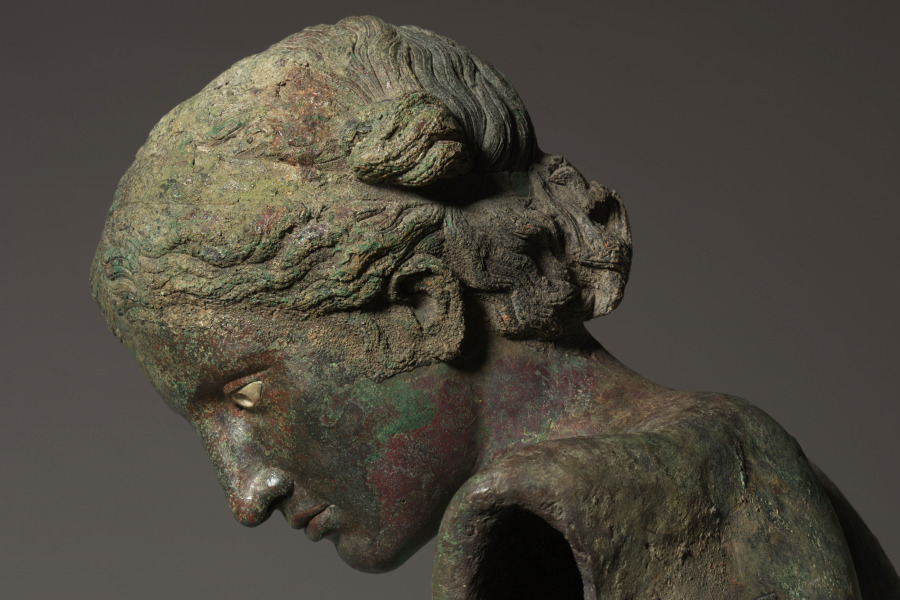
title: The Cleveland Apollo: Apollo Sauroktonos (Lizard-Slayer) or Apollo the Python-Slayer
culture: Greece, Athens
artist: attributed to Praxiteles (Greek, Athenian, c. 400–330 BCE)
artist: or Follower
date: c. 350–200 BCE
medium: bronze, copper and stone inlay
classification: Sculpture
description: The Cleveland Apollo was cast in multiple sections using the indirect lost-wax technique. First, molds were taken from a working model (now no longer known or preserved), which was then reproduced in hollow wax sections, each filled with a clay core. After details were added to the wax models, each was encased in clay. Then, the wax was heated, melted out, and replaced by molten bronze. Once cooled, the hollow bronze sections were fused together and finished, patching flaws and adding inlays and other details. Since the initial model was retained, it could be reused, allowing ancient sculptors to create multiples and variations of favorite works. Thus, remarkably, the Cleveland Apollo may once have been one of several such works. The consistently thin walls of the Cleveland Apollo (mostly 5-6 mm thick), together with the nearly invisible joins between most cast sections, show that it was created by highly skilled sculptors and foundry workers. Close looking reveals several noteworthy features. First, ovals atop the right foot mark a fusion weld, where molten bronze pooled to join separately cast sections. Second, small rectangular bronze patches cover parts of the surface (especially the right hip), each carefully cut and then hammered into place over holes or other casting defects. Inlaid lips, nipples, and eyes (the right ancient stone, the left now a modern replacement) added to the lifelike appearance of the sculpture, contrasting with the once bronze-colored skin. Finally, radiography helps to illuminate hidden features, such as the cast edge of the neck of Apollo.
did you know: Ovals across the top of the right foot show a clear join between separately cast sections.